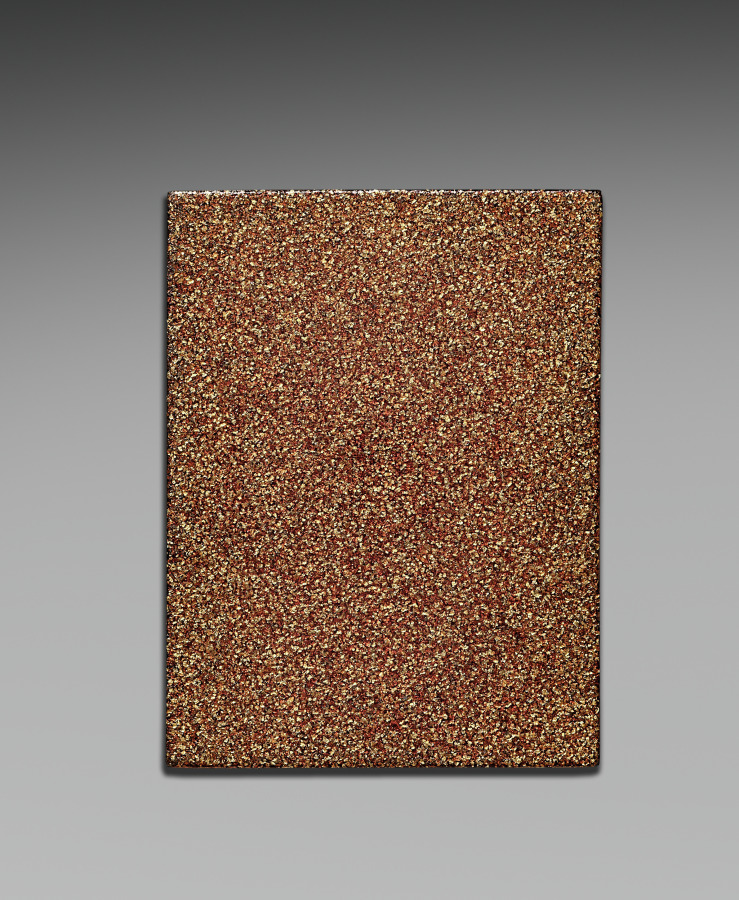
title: Nested Boxes with Chrysanthemums (inner box lid)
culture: Japan, Meiji period (1868–1912)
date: early 1900s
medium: lacquer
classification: Lacquer